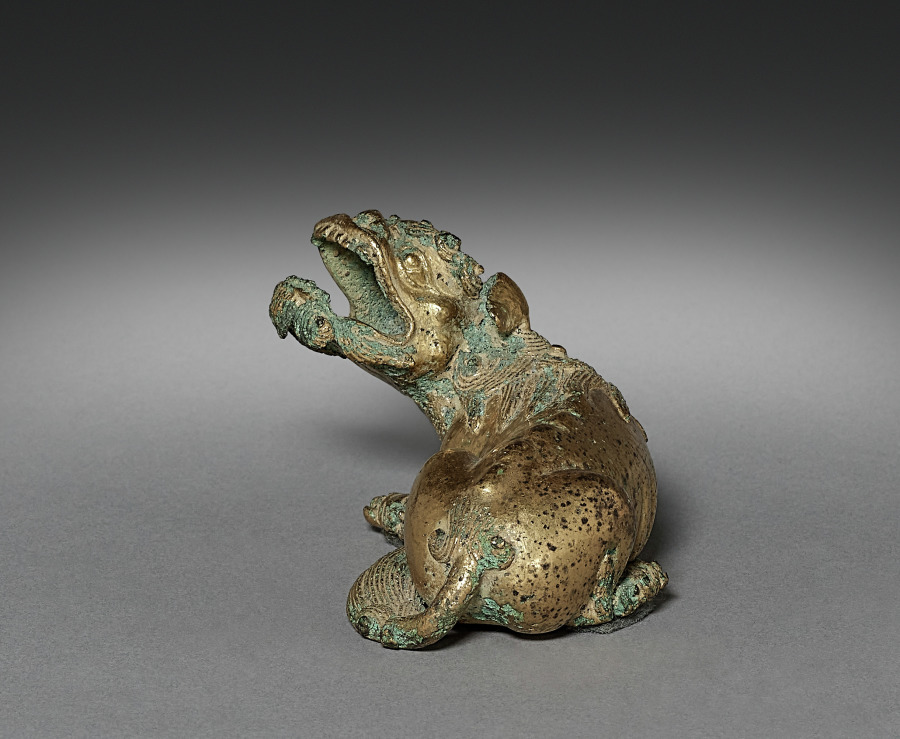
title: Dog-shaped Paperweight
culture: Korea, Unified Silla period (676-935)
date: 676–935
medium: gilt bronze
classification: Sculpture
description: This small object in the shape of a hybrid dog-lion is believed to have been used as a paperweight. Since the Three Kingdoms period (57 BC−668), mercury amalgam gilding had been widely employed to embellish metal objects as well as to make their surface resistant to acids. This technique involves mixing pure gold powder with liquid mercury to form a paste-like mixture. As heat is applied, the mercury evaporates, but an opaque layer of gold remains on the surface. This coating must be polished by first rubbing it with dried rice seedlings, then processing it in ash lye to eliminate impurities; next, the piece is washed and rinsed in a plum vinegar bath.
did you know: This is a dog and lion hybrid.